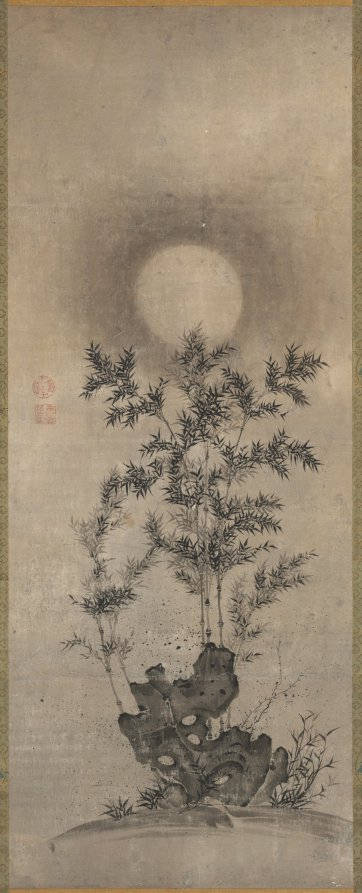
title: Bamboo in Moonlight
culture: Korea, Joseon dynasty (1392–1910)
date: 1500s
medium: hanging scroll; ink on paper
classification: Painting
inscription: two seals of artist (?) at upper left side.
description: This painting depicts the full moon shining through a stand of bamboo, and for Joseon literati it would have conveyed the sense of life in harmony with nature to which they aspired. As one of the "four gentlemen" along with plum trees, orchids, and chrysanthemums, bamboo, which has immense flexibility, allowing it bent to extremes without breaking—symbolize a gentleman's noble virtue. Here, the painter depicted the shining moon rising above a bamboo tree to create a meditative nightly scene.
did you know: This painting is currently in the Korean art collection, but some stylistic features suggest that it may be Japanese.